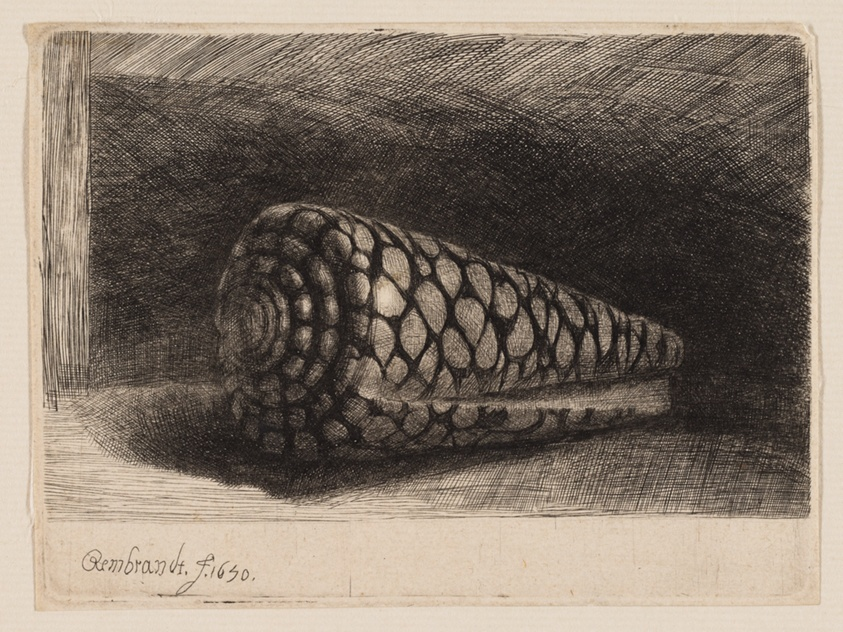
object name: Print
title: The Shell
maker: Rembrandt van Rijn (Dutch, 1606-1669)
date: 1650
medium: Etching on ivory laid paper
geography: Holland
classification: etching; print; prints and drawing; paper